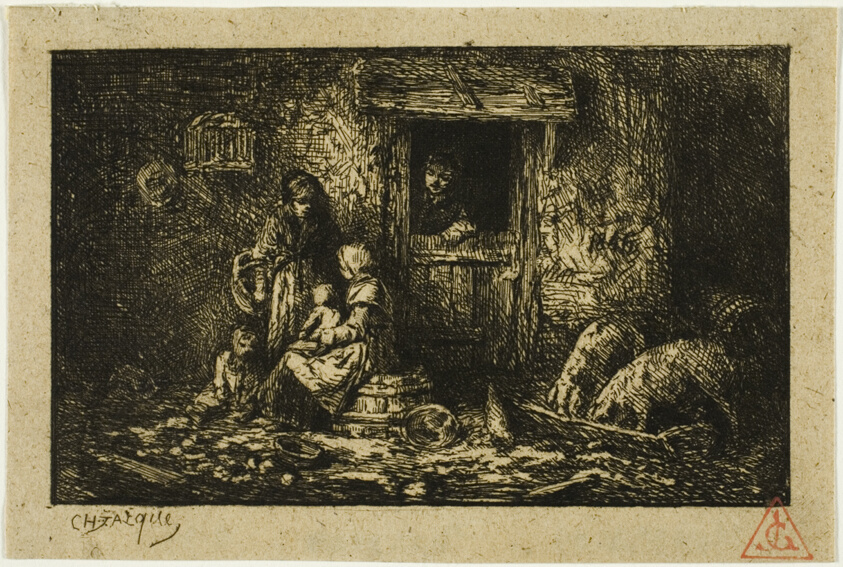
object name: Print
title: Doorway of a Farmhouse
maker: Charles Émile Jacque (French, 1813-1894)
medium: Etching on buff chine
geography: France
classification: etching; print; prints and drawing